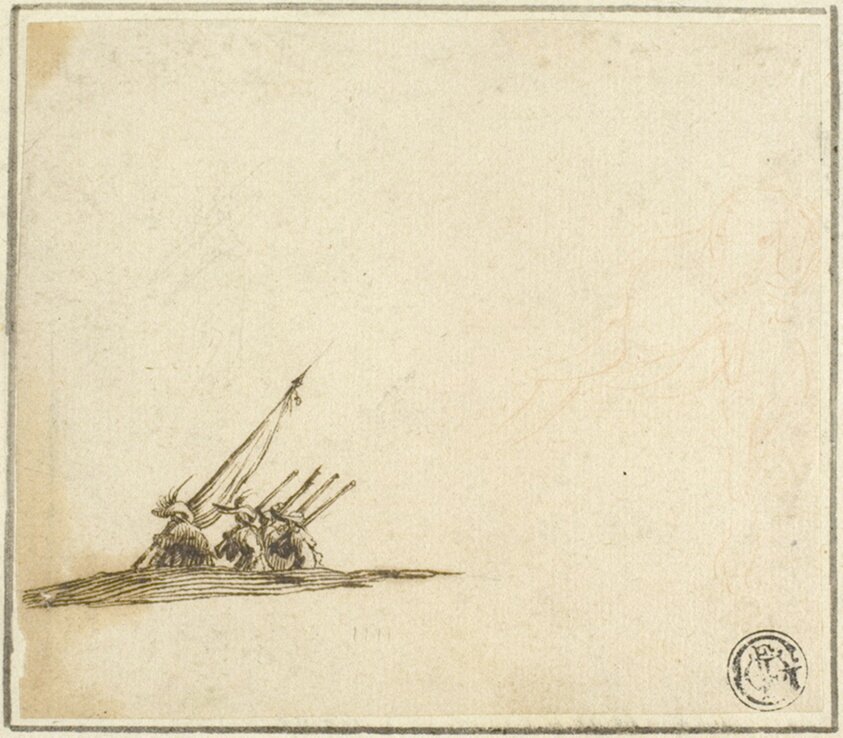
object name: Drawing and Watercolor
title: Group of Foot Soldiers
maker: Attributed to Stefano della Bella (Italian, 1610-1664); or after Jacques Callot (French, 1592-1635)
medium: Pen and brown ink, with red chalk, on ivory laid paper, laid down on cream laid paper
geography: Italy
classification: pen and ink drawings; drawings (visual works); prints and drawing